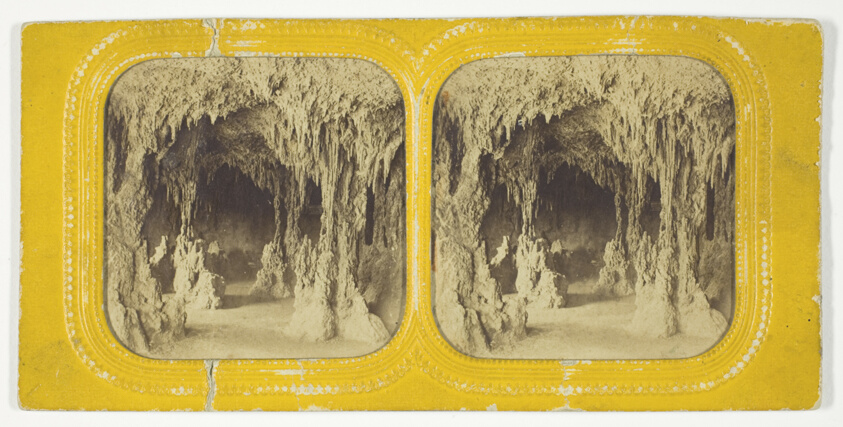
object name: Photograph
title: Grotto at Versailes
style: 19th century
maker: Artist unknown; French, late 19th century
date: 1875/99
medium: Albumen print, stereo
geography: France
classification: photography; photograph